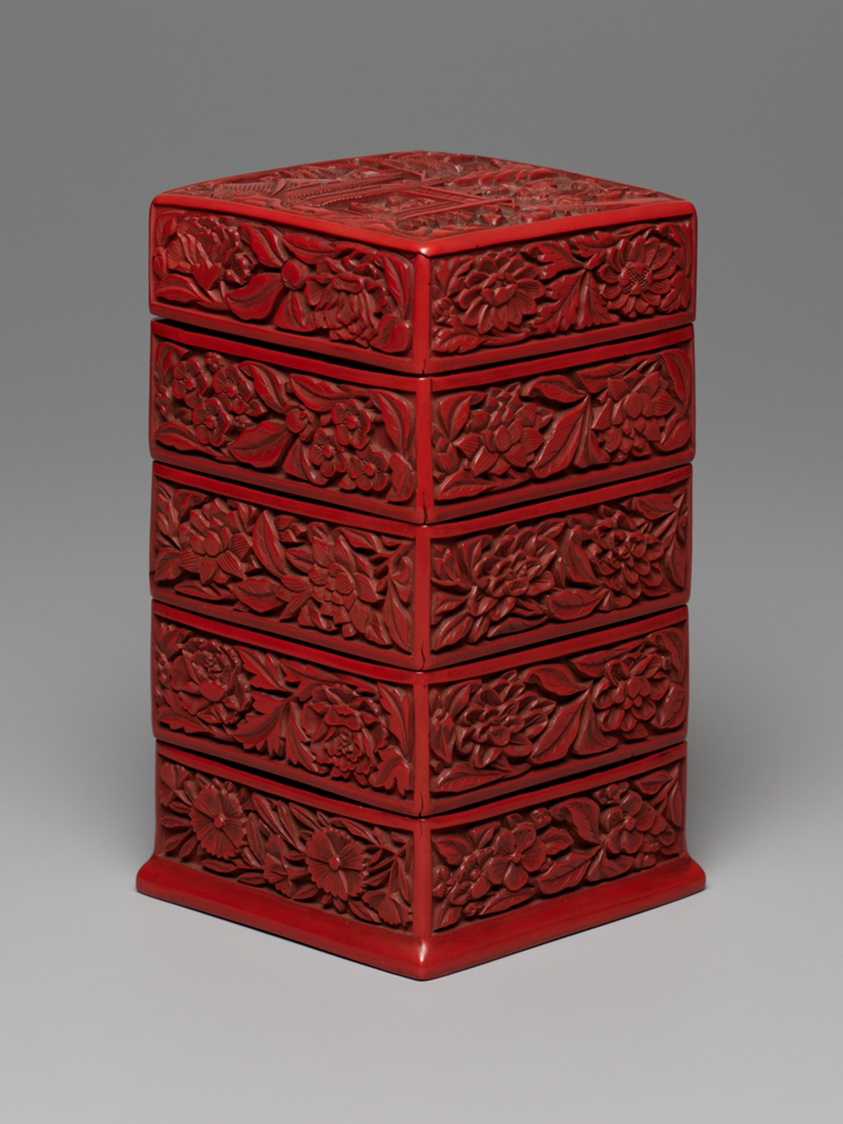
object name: Decorative Arts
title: Four-Tiered Square Box and Cover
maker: China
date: Ming dynasty (1368-1644), 16th century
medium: Carved cinnabar lacquer and black lacquer (interior)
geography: China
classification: lacquer